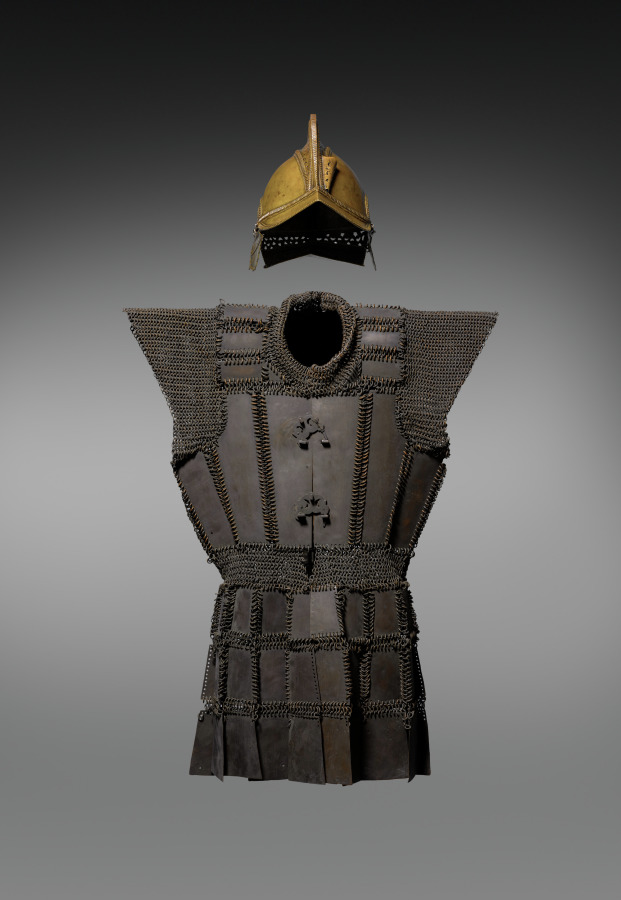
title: Corselet and Helmet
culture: Philippines, Mindanao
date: 1800s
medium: Brass plates and chain mail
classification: Arms and Armor